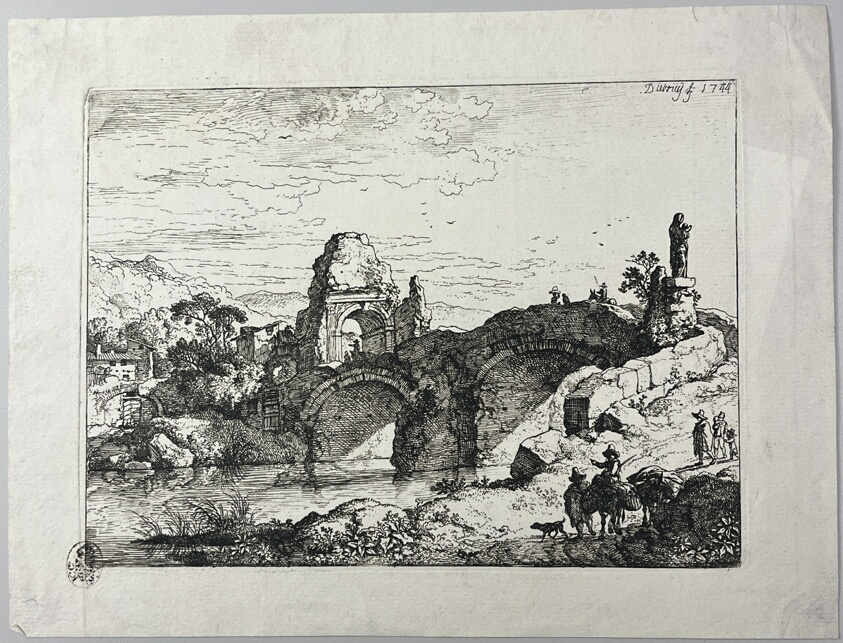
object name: Print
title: The Stone Bridge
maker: Christian Wilhelm Ernst Dietrich (German, 1712-1774)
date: 1744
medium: Etching on laid paper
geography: Germany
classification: etching; print; prints and drawing